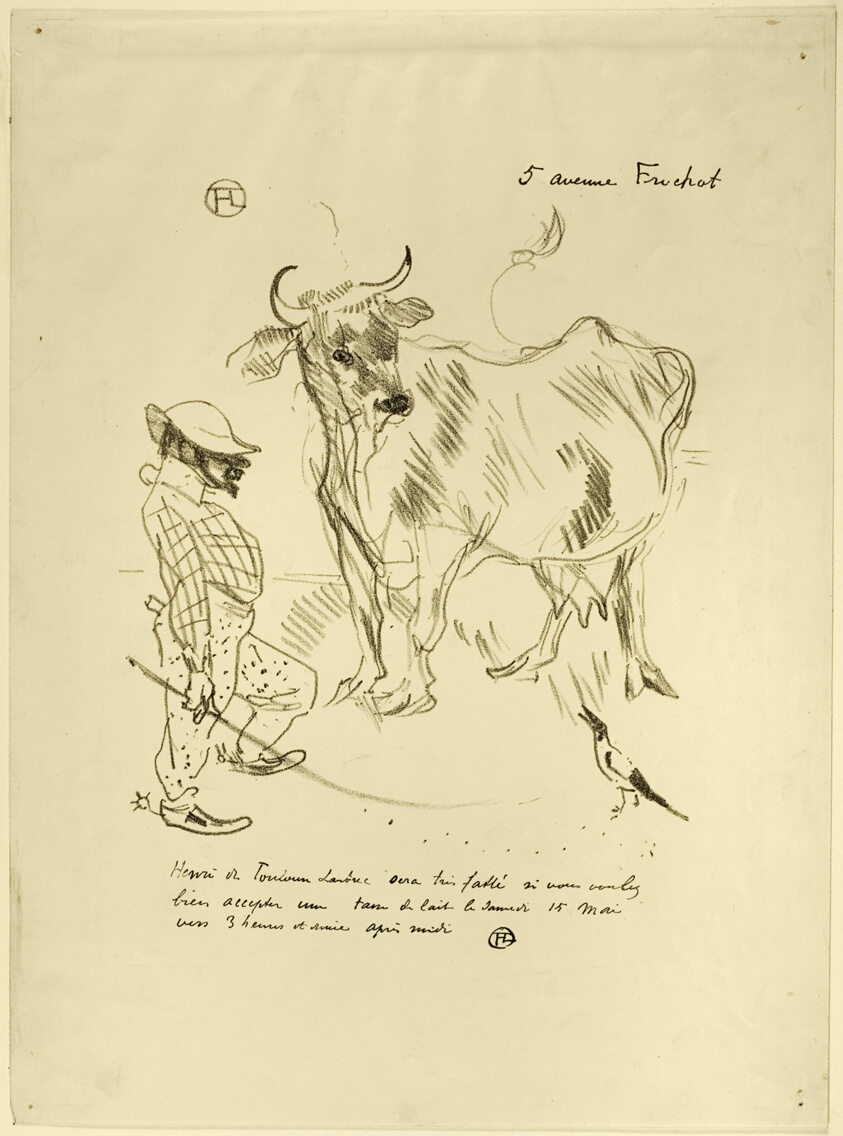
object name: Print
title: Invitation to a Glass of Milk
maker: Henri de Toulouse-Lautrec (French, 1864-1901)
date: 1897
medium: Lithograph on cream wove paper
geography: France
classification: lithograph; print; prints and drawing